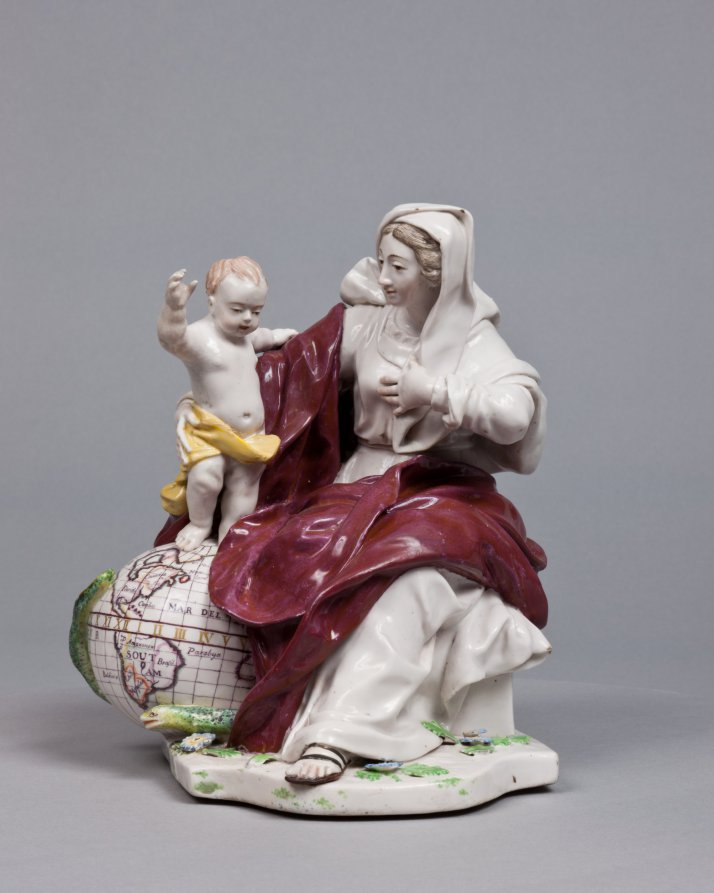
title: Madonna and Child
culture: England, Chelsea, 18th century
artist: Chelsea Porcelain Factory (Britain, London, 1745–84)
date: c. 1755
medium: porcelain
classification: Ceramic